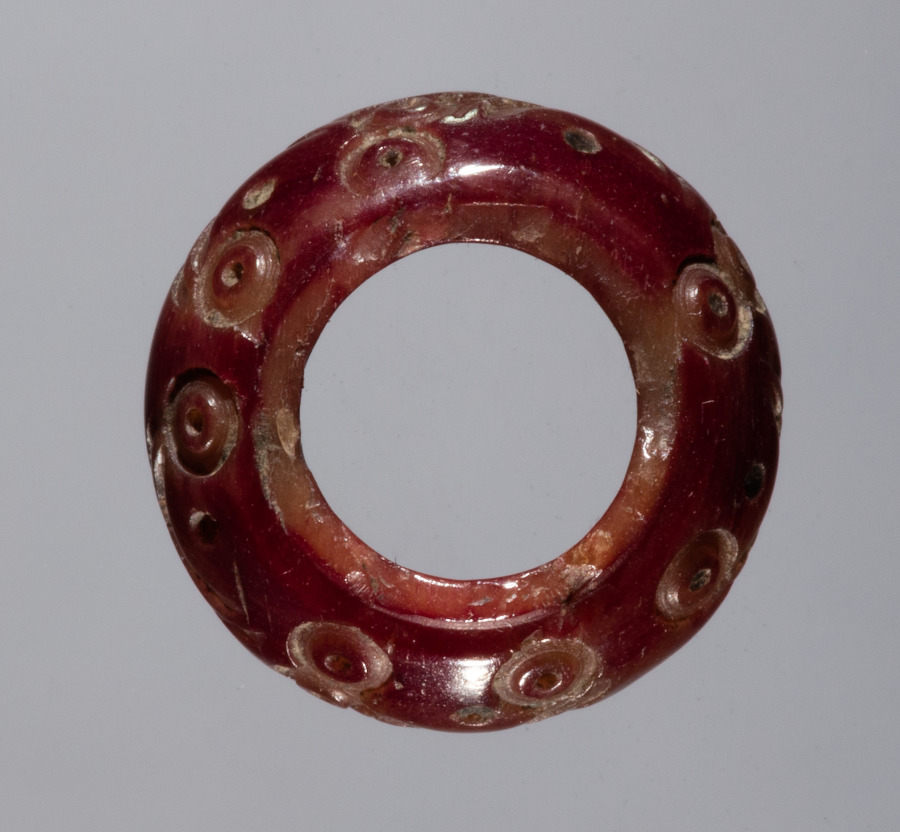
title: Spindle Whorl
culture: Iran, early Islamic period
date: 700s - 900s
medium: bone, incised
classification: Spindle Whorl